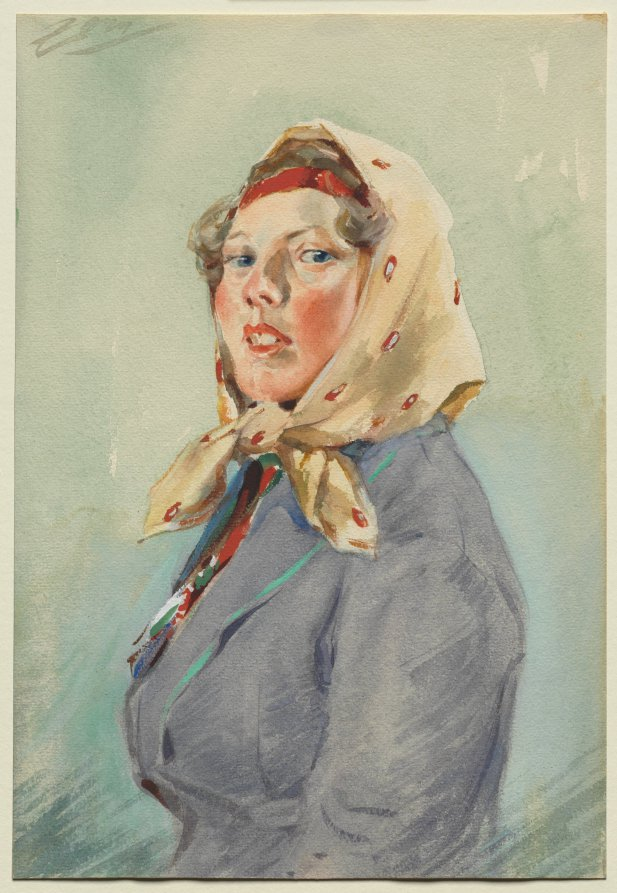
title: Skerikulla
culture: Sweden, late 19th-early 20th century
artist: Anders Zorn (Swedish, 1860–1920)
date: c. 1875–1920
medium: watercolor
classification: Drawing